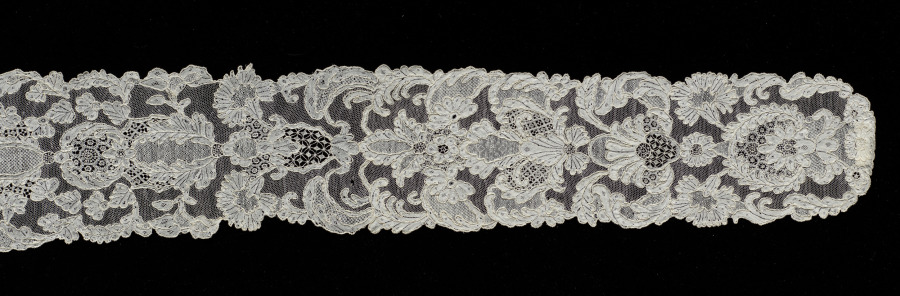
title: Lace Lappets and Edging for Cap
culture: France, Alençon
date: 1700–1715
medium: Needle lace (Point d'Alençon)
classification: Lace